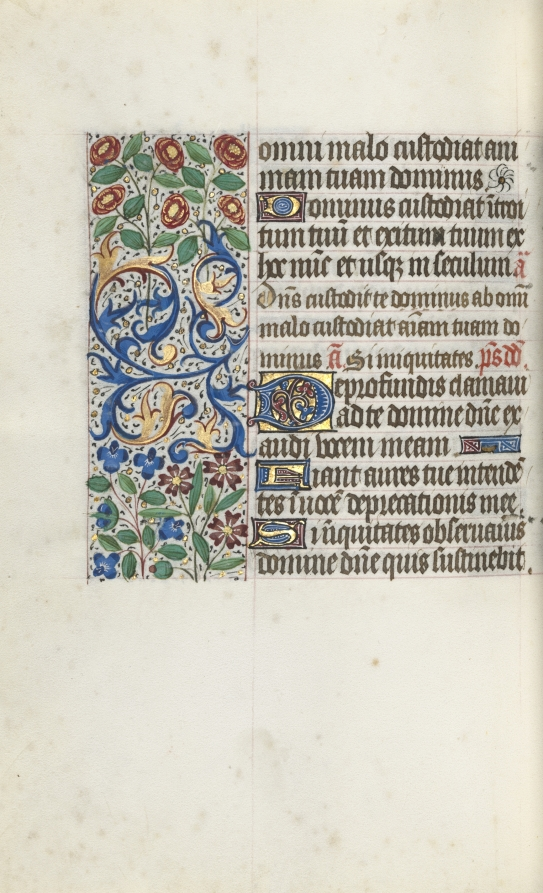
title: Book of Hours (Use of Rouen): fol. 105v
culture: France, Rouen, 15th century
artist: Master of the Geneva Latini (French, active Rouen, 1460–80)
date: c. 1470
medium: ink, tempera, and gold on vellum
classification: Bound Volume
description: In the late 1400s and early 1500s Rouen was an established and important center of book production. The city’s cathedral had a wealthy chapter that spent large sums of money to commission books and to maintain its extensive library. The stationers and booksellers would have likely been concentrated in or near the cathedral precinct. This artist, named after a manuscript now in Geneva, was Rouen’s principal illuminator during the second half of the 1400s.